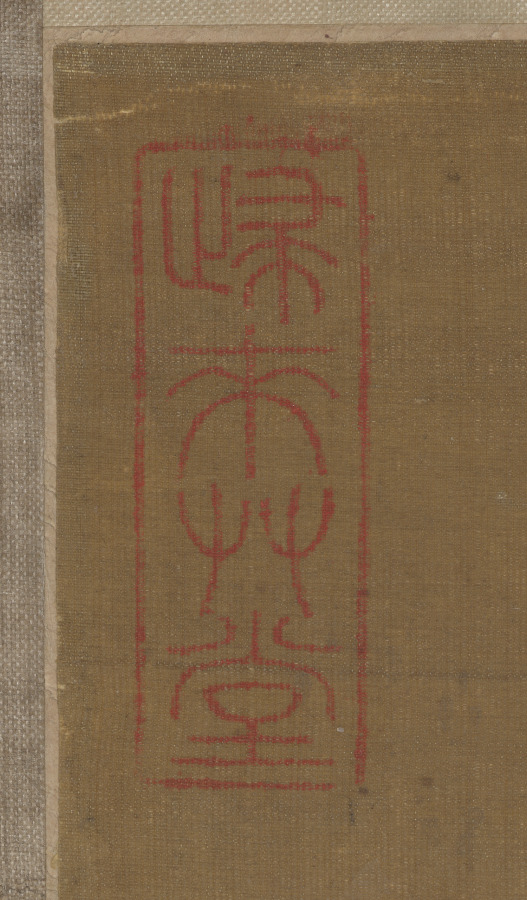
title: Xu Jingyang Moving His Family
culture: China, Ming dynasty (1368–1644)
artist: Cui Zizhong (Chinese, 1574–1644)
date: 1644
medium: Hanging scroll; ink and color on silk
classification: Painting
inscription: Artist's 2 seals: Pei-hai, Cui Zizhong yin.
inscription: 9 additional seals: 2 of Xiang Yuan (18th-19th c.); 1 of Tang Zuomei (late 18th-19th c.); 1 of Zhang Heng 張珩 (1915-1963); 1 of C. C. Wang 王季遷 (1907–2003); 4 unidentified.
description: Xu Jingyang was a dedicated fourth-century Confucian official who allegedly turned into a Daoist immortal. This scroll depicts the legend that when he attained immortality, he took his entire household, including chickens and dogs, to paradise. Cui Zizhong’s painting style intentionally referenced ancient masters. Typical of the pre-Song dynasty landscape tradition, there is the use of blue and green colors and an emphasis on outline rather than texture. While the trembling outlines are reminiscent of earlier painters, the flickering light on rocks and trees is a stylistic feature of Cui’s own time.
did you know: Xu Jingyang, wearing red, is in the upper register of figures, while below his servants transport a rooster, dog, and other supplies.